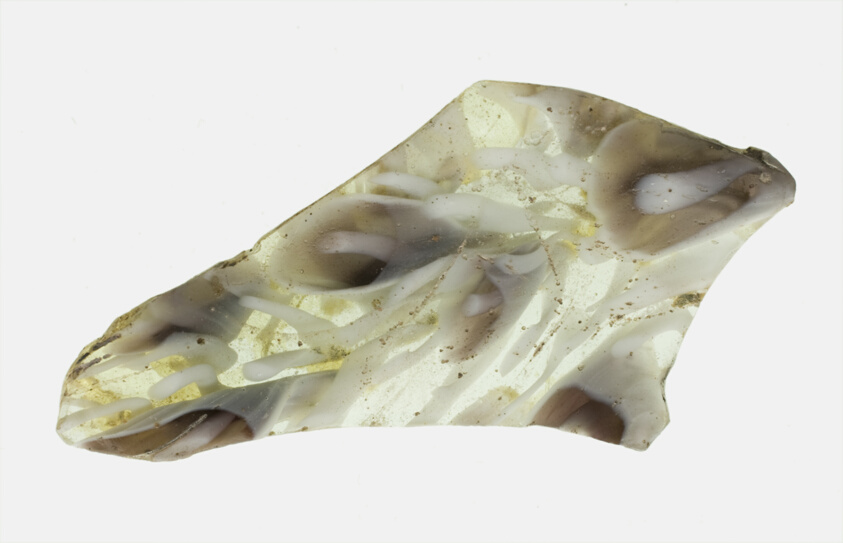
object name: Decorative Arts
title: Bowl Fragment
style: roman (ancient, style or period), ancient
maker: Roman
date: 1st century BCE-1st century CE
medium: Glass, mosaic glass technique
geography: Roman Empire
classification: fragment; bowl; decorative arts